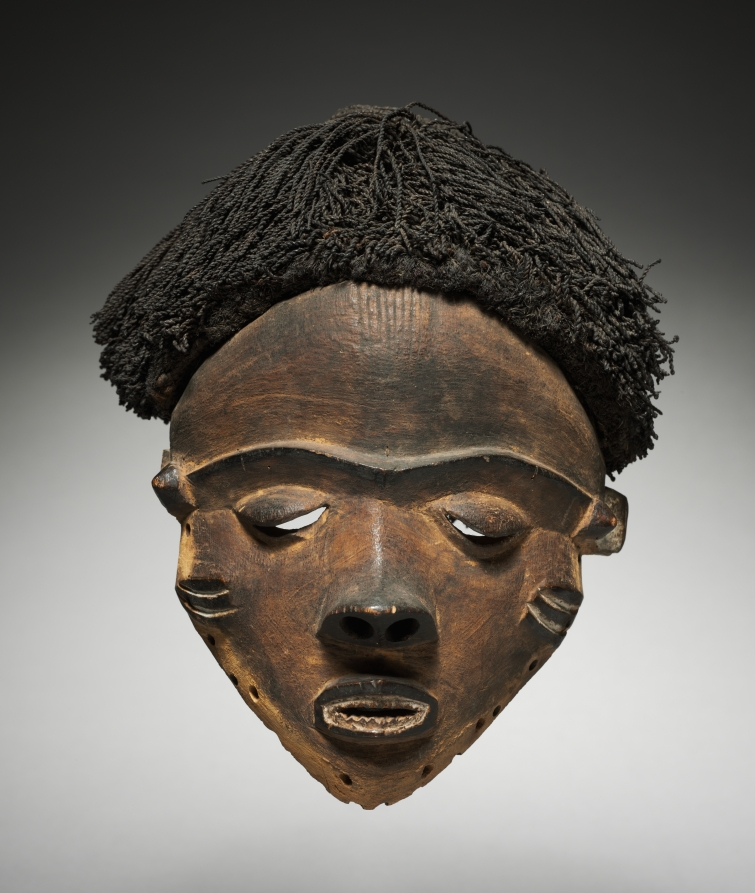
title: Female Mask (Gambanda or Kambanda)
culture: Africa, Central Africa, Democratic Republic of Congo, Pende-style maker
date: early 1900s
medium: Wood, plant fiber, and colorant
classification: Mask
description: Realized in typical Central Pende style, this mask is believed to represent gambanda, the chief's wife. In light of Pende theories about gender and physiognomy, the mask is an ideal expression of a woman's facial features and thus reflects her calm, obedient, peaceful, and self-controlled demeanor. The intricate hairstyle consisting of hundreds of miniature twists imitates a once fashionable hairdo. Pende sculptors inherited their position and often worked on the outskirts of the village so that few could see them at work.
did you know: This female mask would have performed in a collective multimedia event with audience participation.